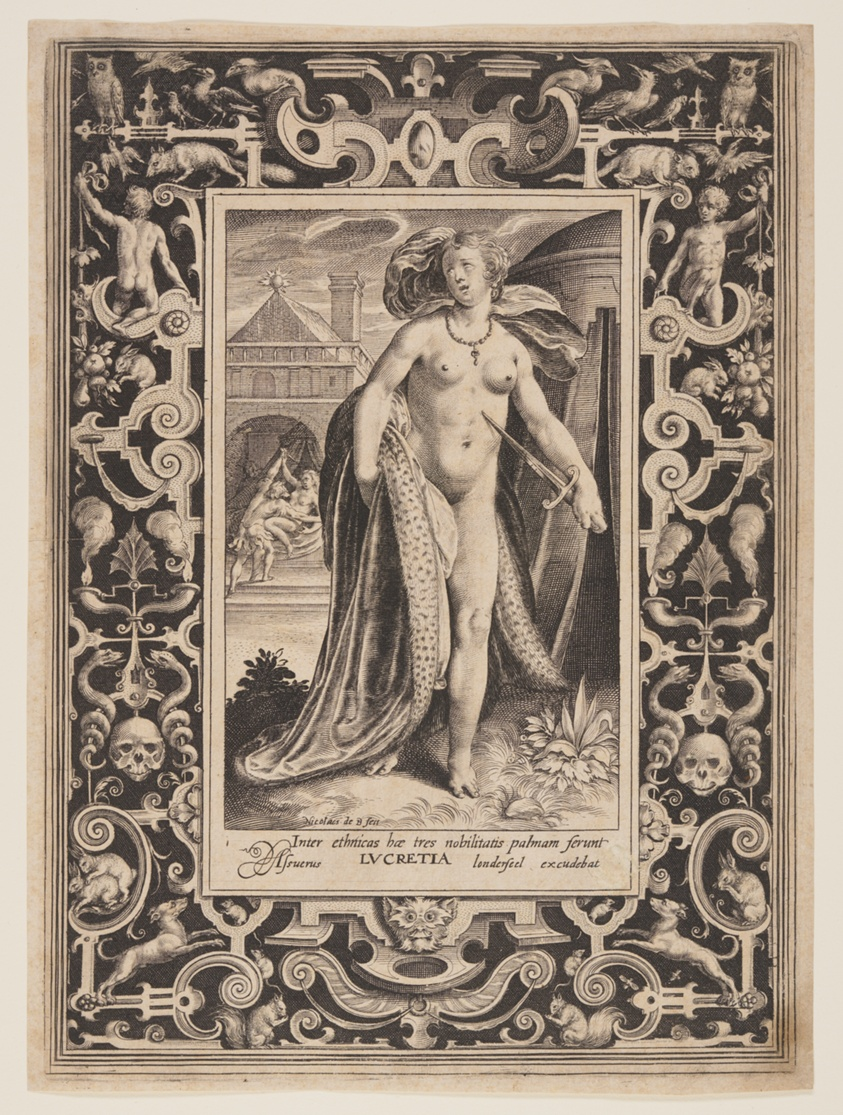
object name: Print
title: Lucretia, plate one from The Nine Worthies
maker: Nicolaes de Bruyn (Flemish, 1571–1656)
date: c. 1595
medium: Engraving on ivory laid paper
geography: Flanders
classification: print; paper; prints and drawing; engraving